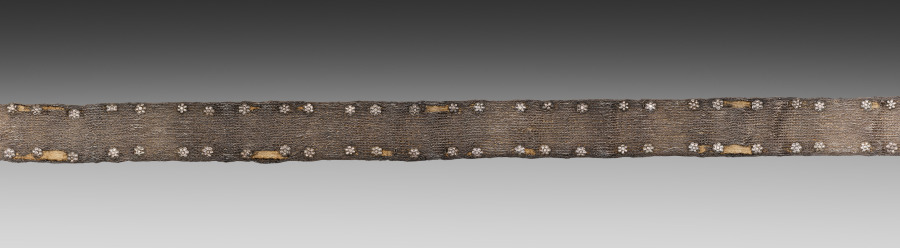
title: Belt for a Lady's Dress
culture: Italy, Siena(?)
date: c. 1375–1400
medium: basse-taille enamel and gilding on silver, silver thread, gilt-silver buckle, cast and chased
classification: Jewelry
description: Because of its extraordinary richness, this belt (also known as a girdle) was both an ornament for the body and an object of great personal luxury. Almost eight feet in length, belts like this were at the height of fashion for both men and women. After being passed around the waist and through the buckle, one end of the belt would fall to the hem of the garment. The belt's many colorful enamel plaques are worked in translucent enamel over decoration engraved into the silver beneath (an enameler's technique known as basse-taille). Within the plaques and cast into the buckle are scenes of courtly love, musicians, and fantastic animals. A large number of translucent enamels were made for secular objects during the late Middle Ages for use on jewelry, cups, garment clasps, and similar objects. This belt is a rare survival among these now scarce objects.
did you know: Look closely at the tiny scenes of courtly love on the plaques that adorn this belt. Given their size, these scenes were designed for the enjoyment of the woman who wore this belt over a sumptuous dress rather than an admirer from a distance.